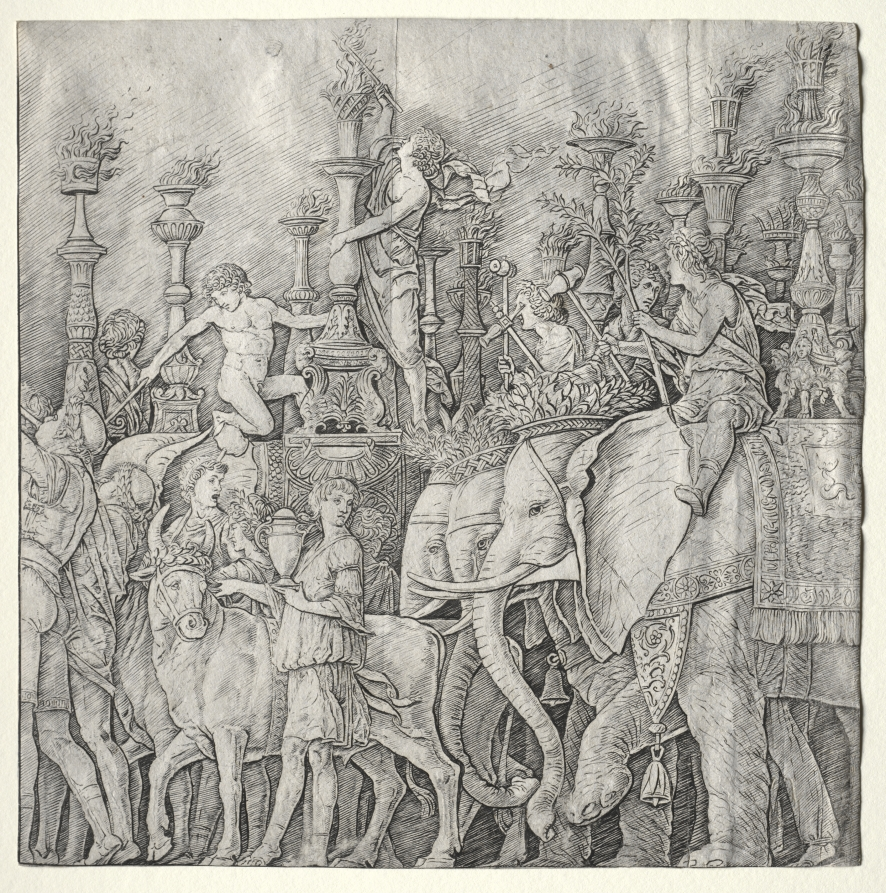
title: The Triumphs of Caesar: The Elephants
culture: Italy, 15th century (?)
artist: Giulio Campagnola (Italian, 1482–1515)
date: c. 1485–1490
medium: engraving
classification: Print